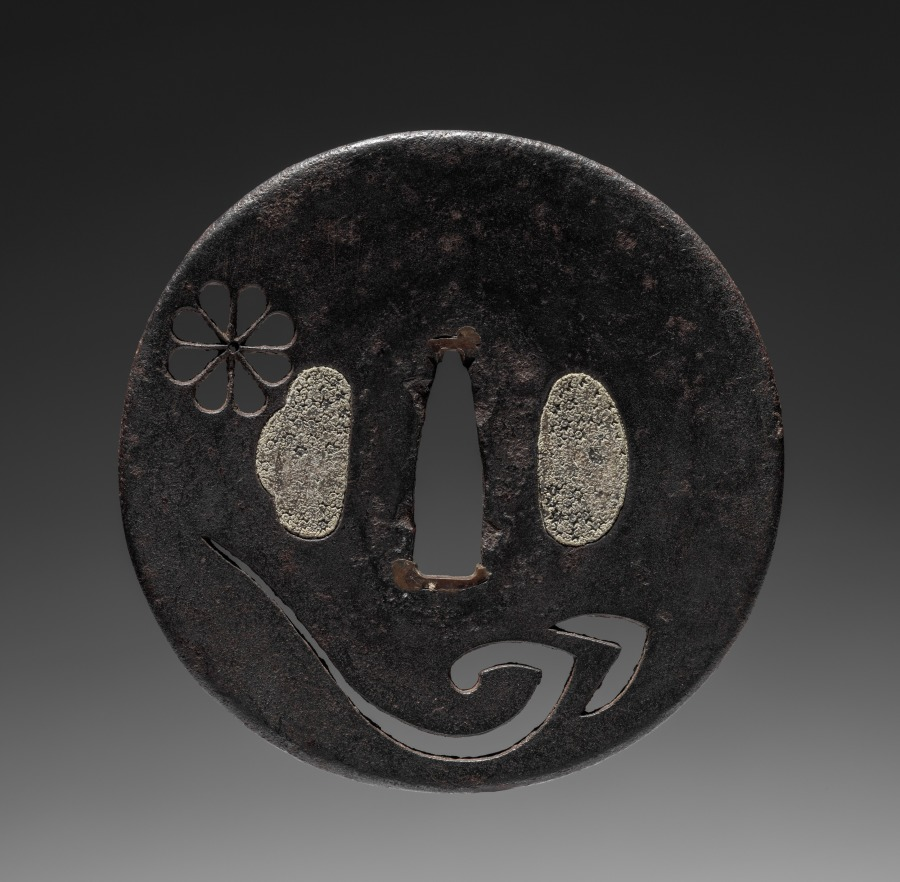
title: Sword Guard (Tsuba)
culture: Japan, possibly Edo period (1615-1868)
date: c. 1615–1868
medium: iron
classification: Arms and Armor